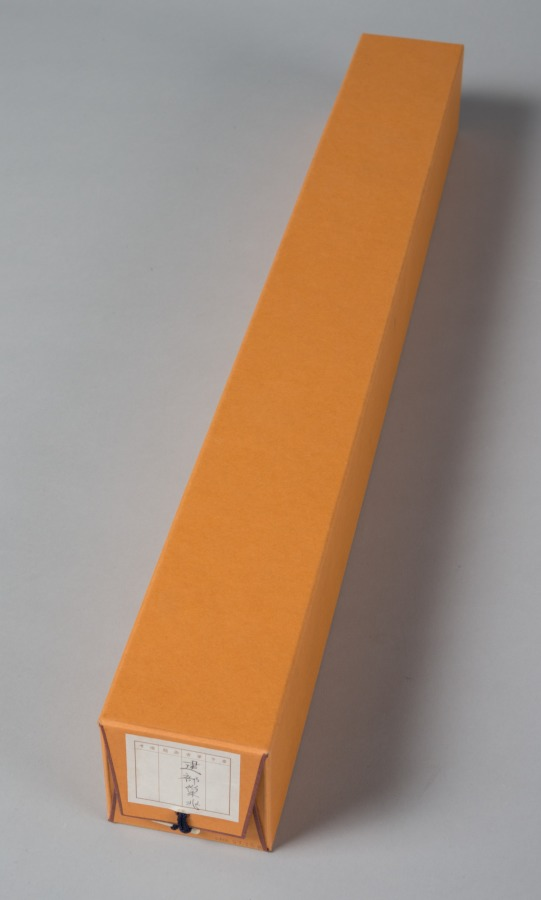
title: Genre Figures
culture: Japan, Edo period (1615–1868)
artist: Takebe Sōchō (Japanese, 1760–1814)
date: c. 1816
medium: hanging scroll; ink and color on paper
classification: Painting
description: Though rarely mentioned in official histories, Socho was an accomplished painter whose talent is readily apparent to the modern eye. For his compositions he chose traditional Japanese stories or everyday events. This painting belongs to a triptych (set of three) that was recently converted from folding screen panels to hanging scrolls.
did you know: The adult in this painting transports a small sculpted image of the fox deity Inari atop his head.